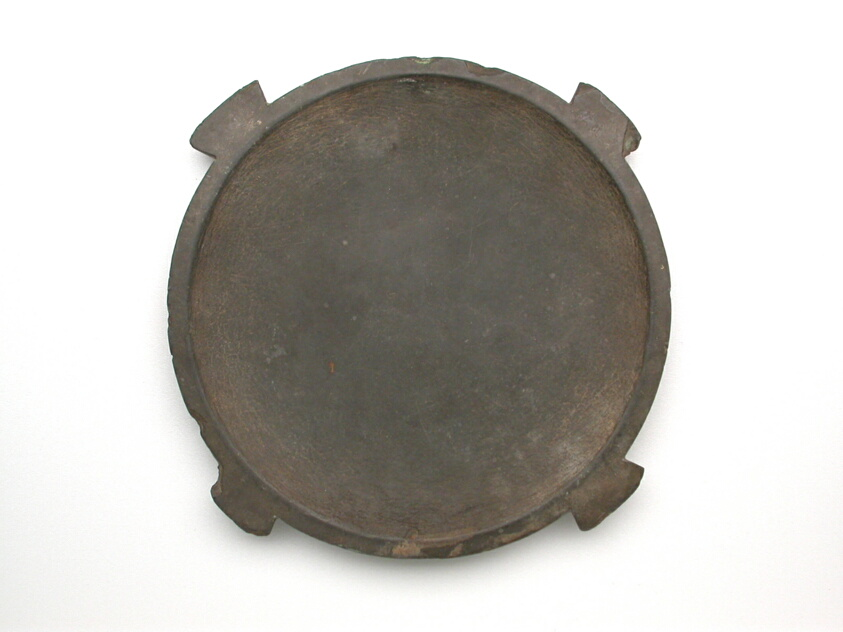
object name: Costume and Accessories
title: Mortar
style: ptolemaic, greco-roman (egyptian), roman period (egyptian)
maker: Egyptian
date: Ptolemaic–Roman Period (332 BCE–395 CE)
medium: Slate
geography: Egypt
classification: mortar (grinding tool); stone; vessel; ancient art; costume